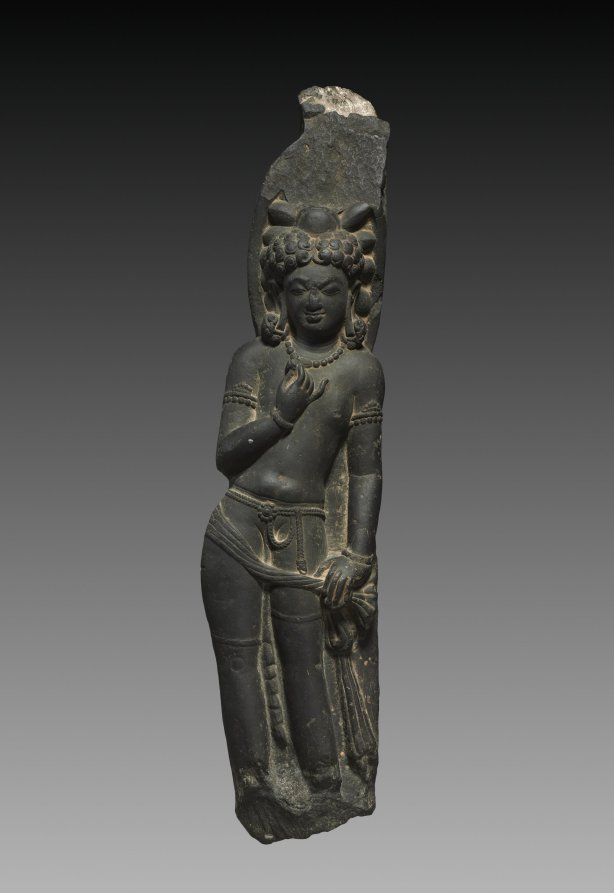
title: Personification of the Discus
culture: Northeastern India, Bihar, Aphsad, early Pala period, 7th Century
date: 670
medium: chlorite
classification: Sculpture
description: Vishnu's main weapon is the discus, or chakra in Sanskrit. Vishnu's chakra is a wheel that is a metaphor for true knowledge, which he uses in mythic battles to slice demons who stand for ignorance and self-centered arrogance. Iconic images of Vishnu show him as four-armed, with a discus in one hand; sometimes the discus is personified. This personification, with the chakra behind his head, has broken away from the main image of Vishnu. Stylistically this sculpture retains memories of the Gupta styles, with the lush ringlets of hair curling from a central part, the relatively simple adornments, and the soft contours of the body. The exaggerated facial expression and figural proportions indicate a transition to a later period.